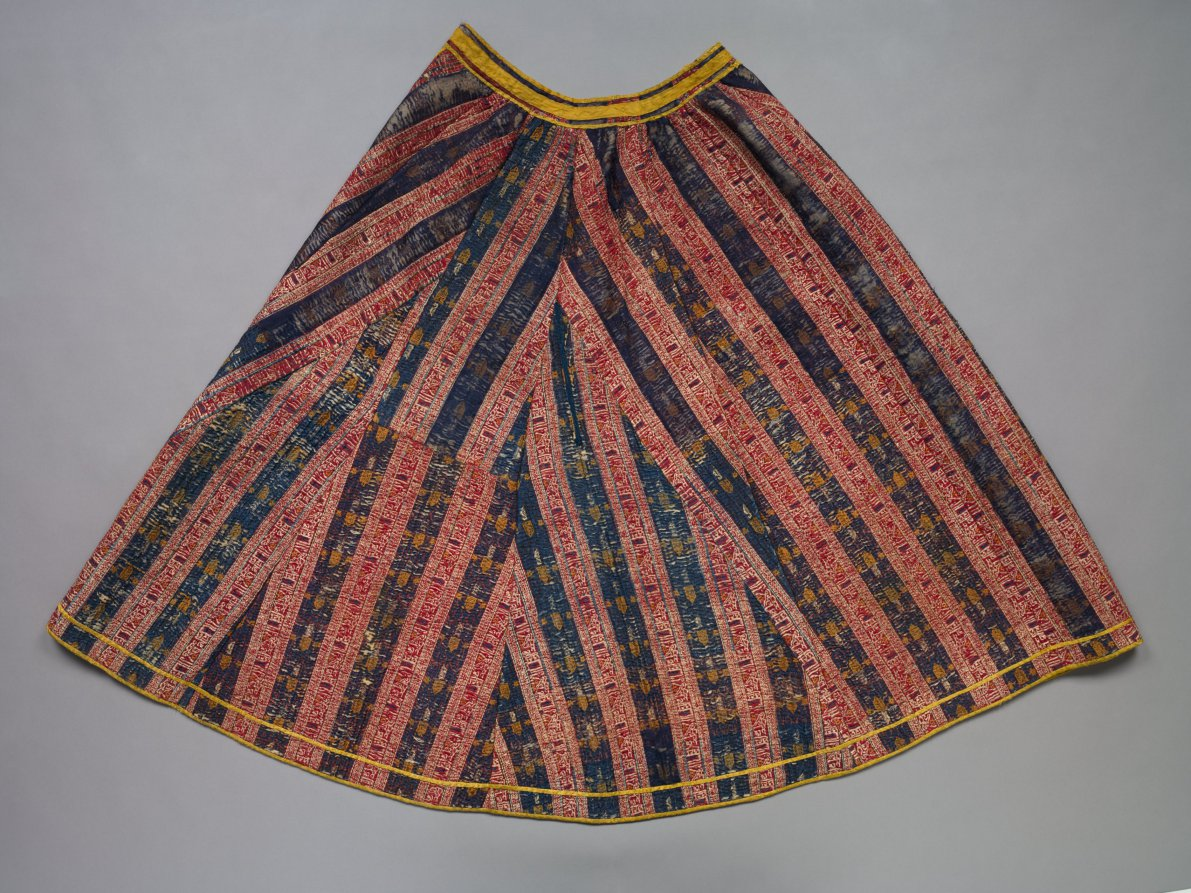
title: Mantle for a statue of the Virgin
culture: Spain, Granada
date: late 1400s–1500s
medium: Silk: lampas weave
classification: Textile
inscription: on red ground is Naskhi inscription "Glory to our Lord, the Sultan" in white.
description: A striped silk textile, probably made for use in the Islamic Alhambra palatine complex, was turned into a mantle for a statue of the Virgin Mary. On the crimson stripes the salutation that occurs as ornamental text throughout the Alhambra, Glory to our Lord the Sultan, repeats in Arabic script.